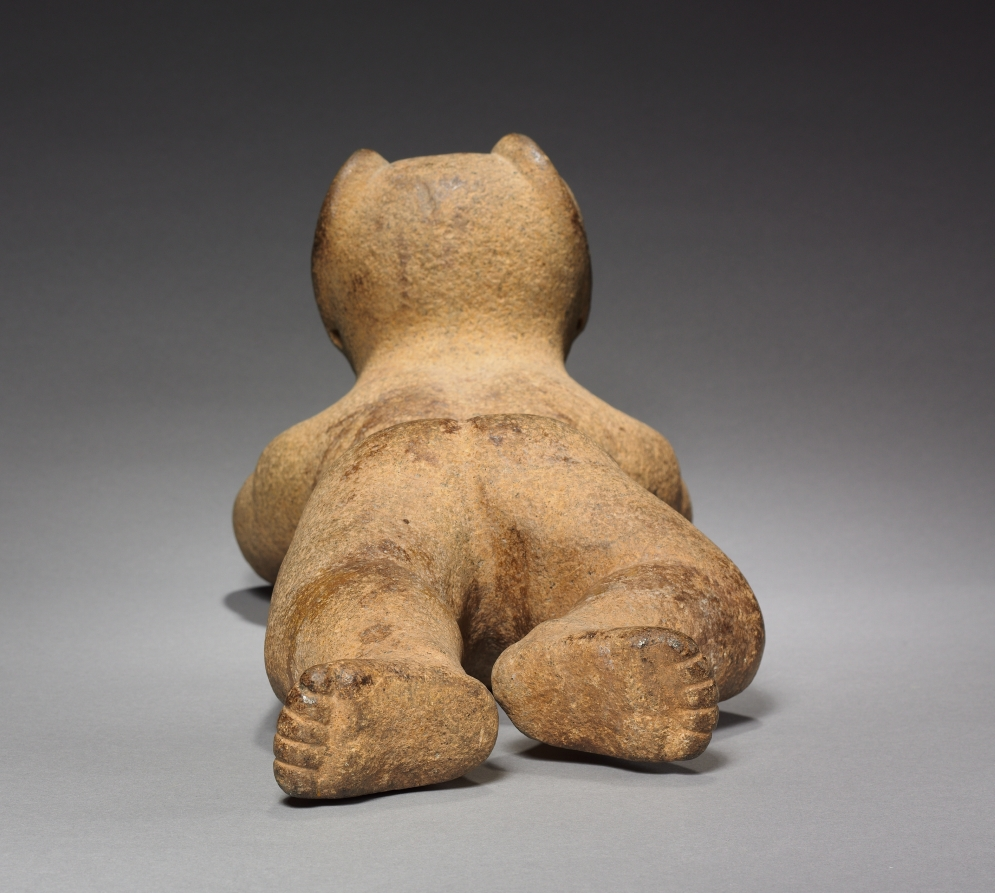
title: Reclining Figure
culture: Mexico, Gulf Coast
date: 300–600 CE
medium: stone, pigment traces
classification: Sculpture